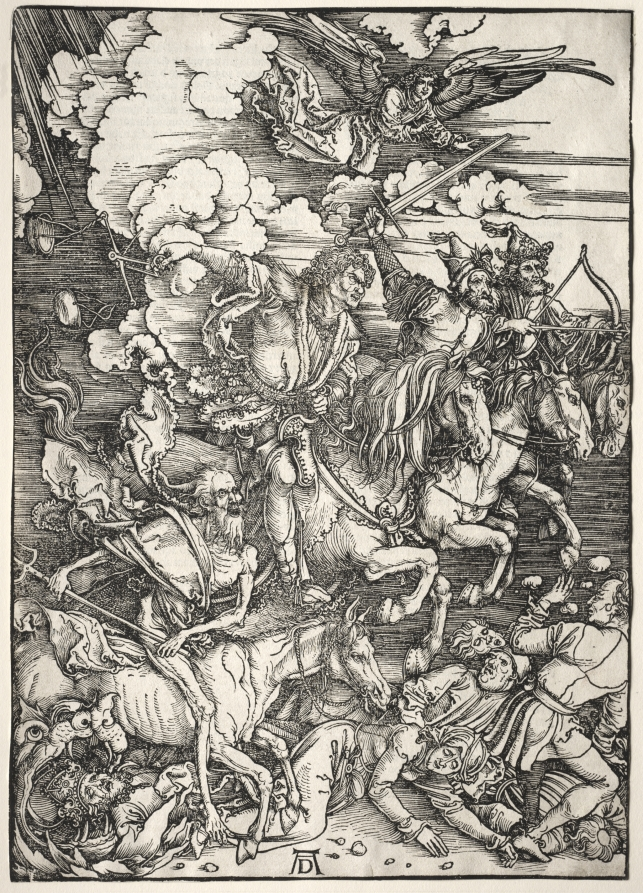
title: Revelation of St. John: The Four Horsemen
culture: Germany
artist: Albrecht Dürer (German, 1471–1528)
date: 1511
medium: woodcut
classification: Print